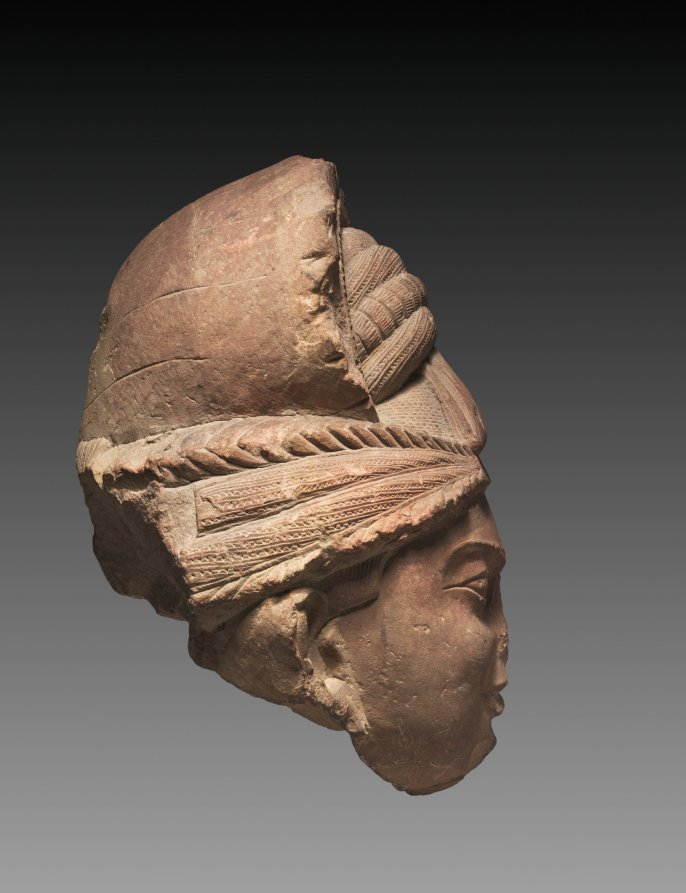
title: Head of a Bodhisattva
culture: India, Mathura, Kushan period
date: 75–early 100s CE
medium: red sandstone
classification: Sculpture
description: This monumental male head must have originally belonged to a larger-than-life Bodhisattva image. The imposing turban is of the type worn by royalty, divinities, and nobility during the Kushan period from the first through third century. The round, fleshy face, heightened by a subtle smile, retains the powerful quality of early Kushan and pre-Kushan images of nature divinities, known as yakshas.